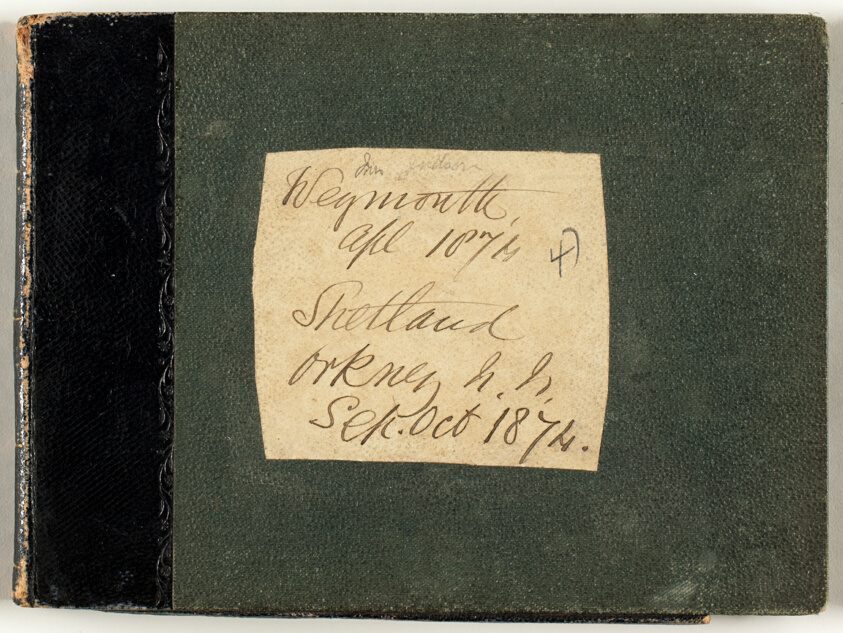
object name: Book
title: Weymouth, Shetland, and Orkney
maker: Charles George Lewis (English, 1808-1880)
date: 1874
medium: Sketchbook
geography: England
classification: sketchbook; watercolor; prints and drawing; book